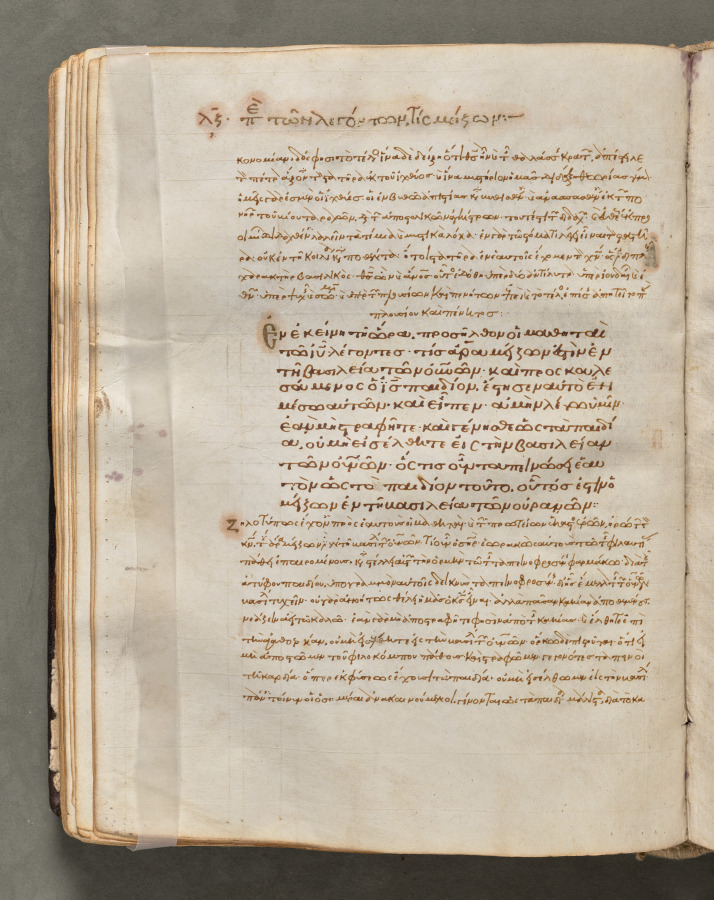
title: Text, folio 79 (verso), from a Gospel Book with Commentaries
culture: Byzantium, Constantinople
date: c. 1000–1100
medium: ink, tempera, and gold on vellum; leather binding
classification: Bound Volume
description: Each of the four gospels in this book opens on a page with brilliantly illuminated borders depicting the author of the text as well as birds-principally peacocks, symbols of the immortality of the soul-and fountains, representing the fountain of life and the salvation of the soul. This volume consists of 428 leaves with texts in Greek. Its level of sophistication suggests that it was probably written and decorated in a monastery in Constantinople.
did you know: Gospel Books were carried in procession through Byzantine churches.